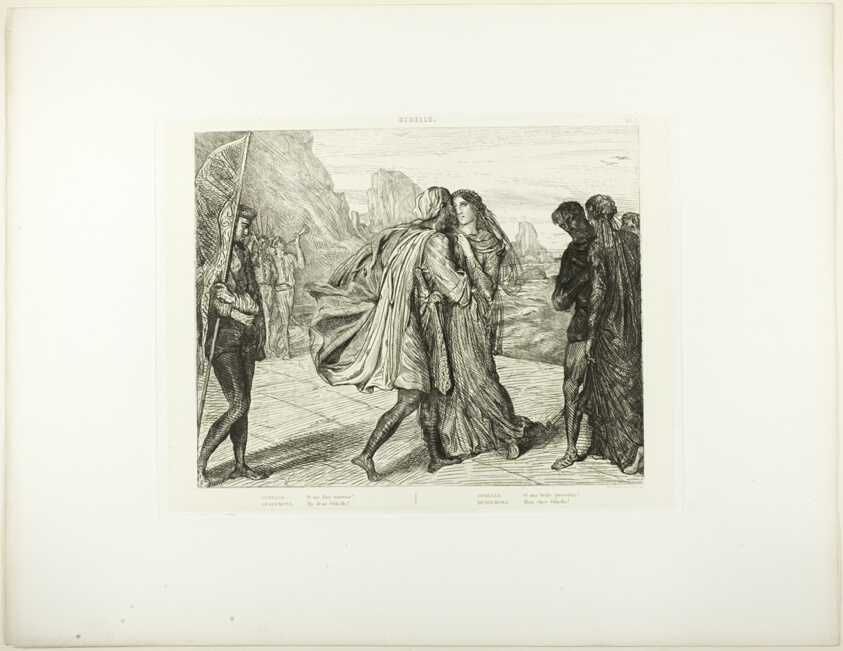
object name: Print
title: O My Fair Warrior!, plate 5 (act 2, scene 1) from Othello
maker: Théodore Chassériau (French, 1819-1856)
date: 1844, printed 1900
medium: Etching, engraving, roulette and drypoint on ivory chine, laid down on white wove paper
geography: France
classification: etching; print; prints and drawing